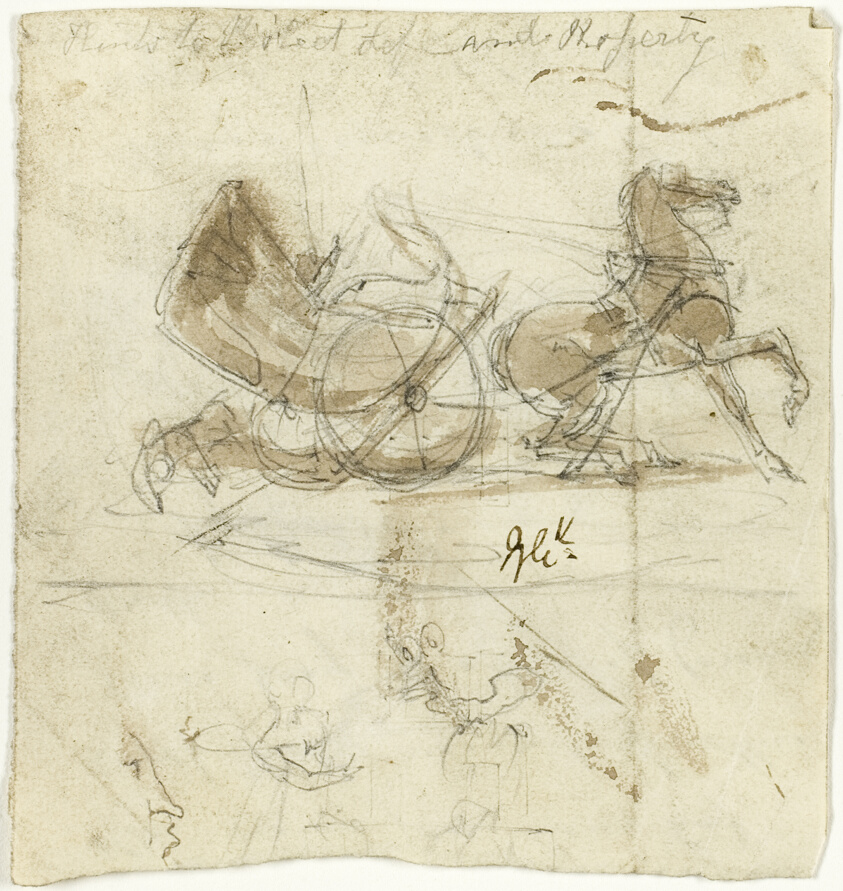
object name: Drawing and Watercolor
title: Caricature of Self (recto); Cab Thrown by a Horse, with Other Sketches (verso)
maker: George Cruikshank (English, 1792-1878)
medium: Graphite (recto), and graphite and brush and brown wash (verso), on cream wove paper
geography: England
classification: graphite; drawings (visual works); prints and drawing